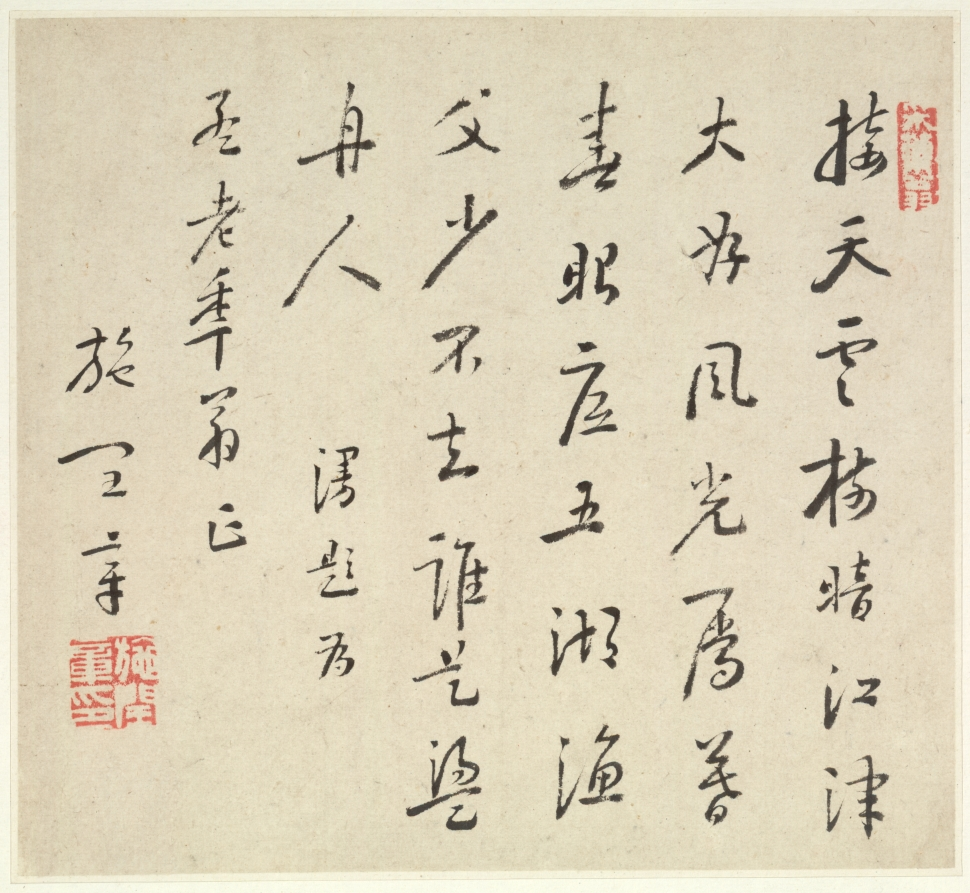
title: Album of Landscapes: Leaf 1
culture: China, Qing dynasty (1644-1911)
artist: Wang Gai (Chinese, active c. 1677–1705)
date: 1677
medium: album leaf, ink and light color on paper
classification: Painting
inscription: Poem by Shih-Jun-chang